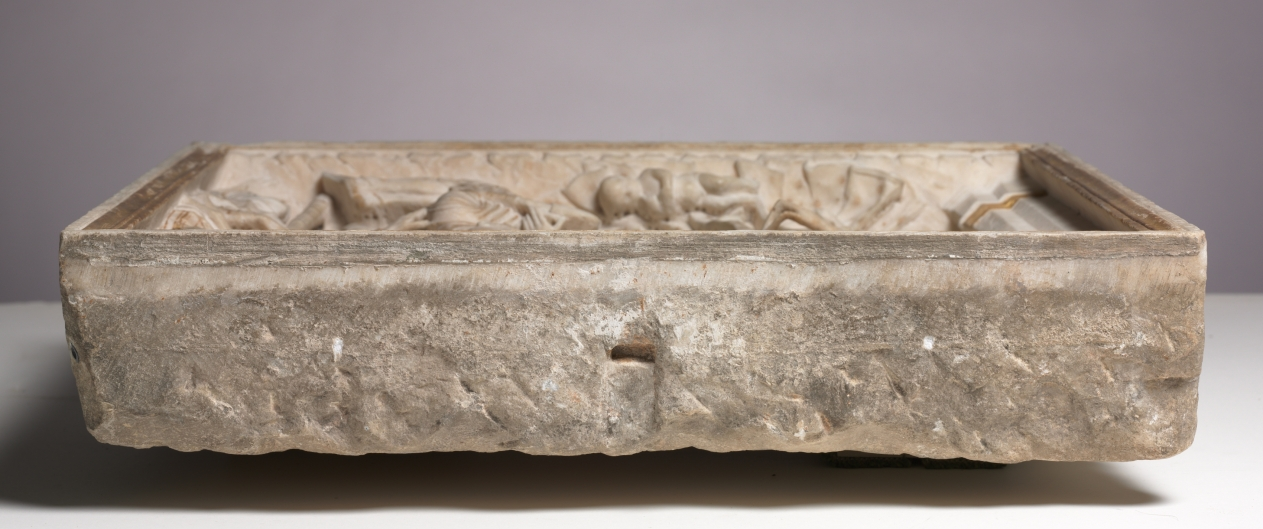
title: Pier Francesco Visconti, Court of Saliceto, Adoring the Christ Child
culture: Italy, Milan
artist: workshop of Benedetto Briosco (Italian, c. 1460–after 1514)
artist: and Tomaso Cazzaniga (Italian)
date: shortly after 1484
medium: marble with gilding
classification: Sculpture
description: This relief formed part of a public funerary monument in the church of Santa Maria del Carmine in Milan. The military leader and diplomat humbly kneels in profile before the infant Christ in a naturalistic setting, drawing attention to the Holy Family’s humanity and the deceased man’s reverence.